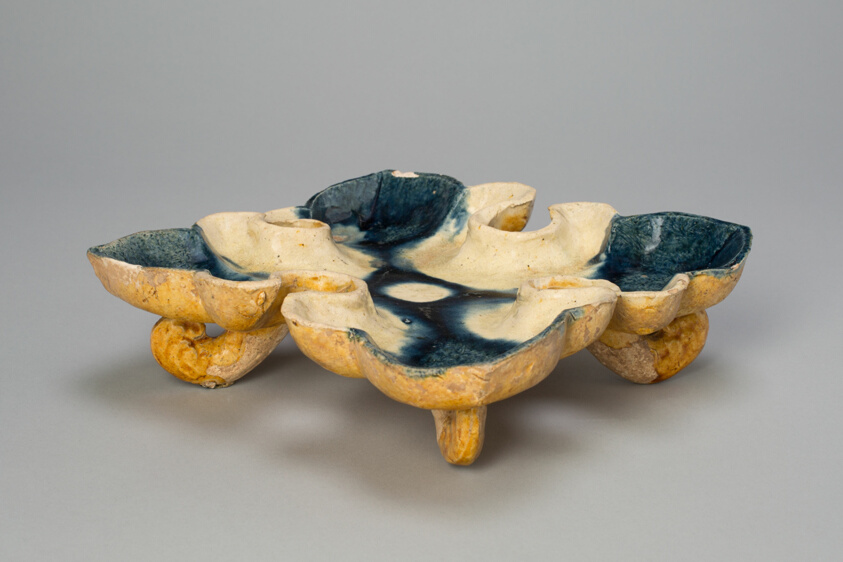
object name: Vessel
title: Quatrefoil Footed Dish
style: Chinese (culture or style)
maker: China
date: Tang dynasty (618–907), first half of 8th century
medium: Earthenware with cobalt blue and lead amber glazes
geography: China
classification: dish (vessel); earthenware; ceramics; asian art; vessel